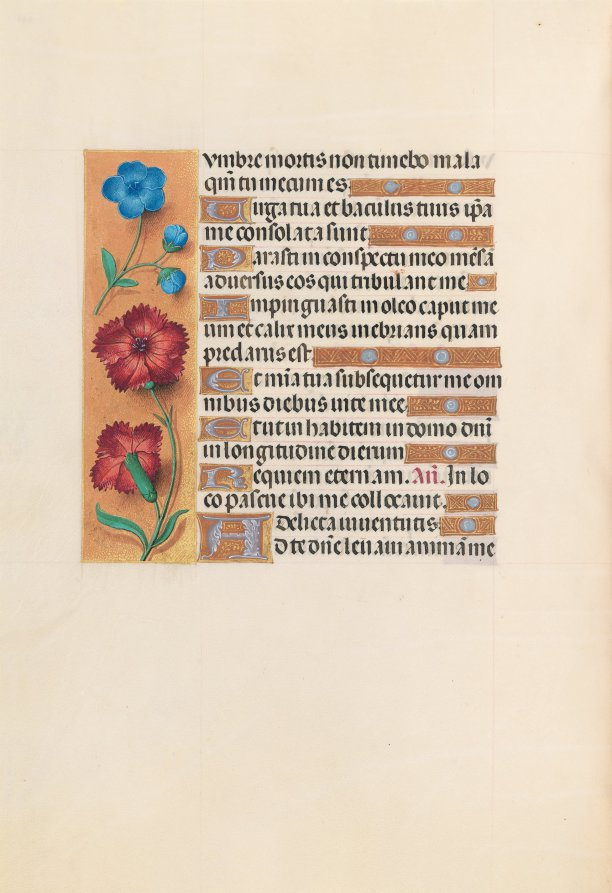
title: Hours of Queen Isabella the Catholic, Queen of Spain: Fol. 233v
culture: Flanders, Ghent and Bruges, late 15th century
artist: Master of the First Prayerbook of Maximillian (Flemish, c. 1444–1519)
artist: and Associates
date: c. 1500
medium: ink, tempera, and gold on vellum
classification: Bound Volume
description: This manuscript was illuminated by a circle of at least five highly organized manuscript painters active in the Flemish cities of Ghent and Bruges. The principal illuminator was Alexander Bening, who painted the majority of the book's miniatures. Manuscripts produced by this circle of artists are renowned for the decoration of their borders, which typically feature a rich variety of realistically-painted flowers, birds, and butterflies. This prayer book, called a book of hours, was intended not for a cleric, but for the private devotions of a lay person-in this case, Isabella the Catholic, Queen of Spain (1451-1504). Isabella's coat of arms embellishes the book's frontispiece. It is unlikely that the book was commissioned by the Queen herself; rather, she probably received it as a diplomatic gift from someone courting her patronage, perhaps Cardinal Francisco Jimenez de Cisneros. A Franciscan friar, Jimenez was dependent upon Isabella for his advancement, first to the post of Queen's confessor in 1492, and then to Archbishop of Toledo in 1495.